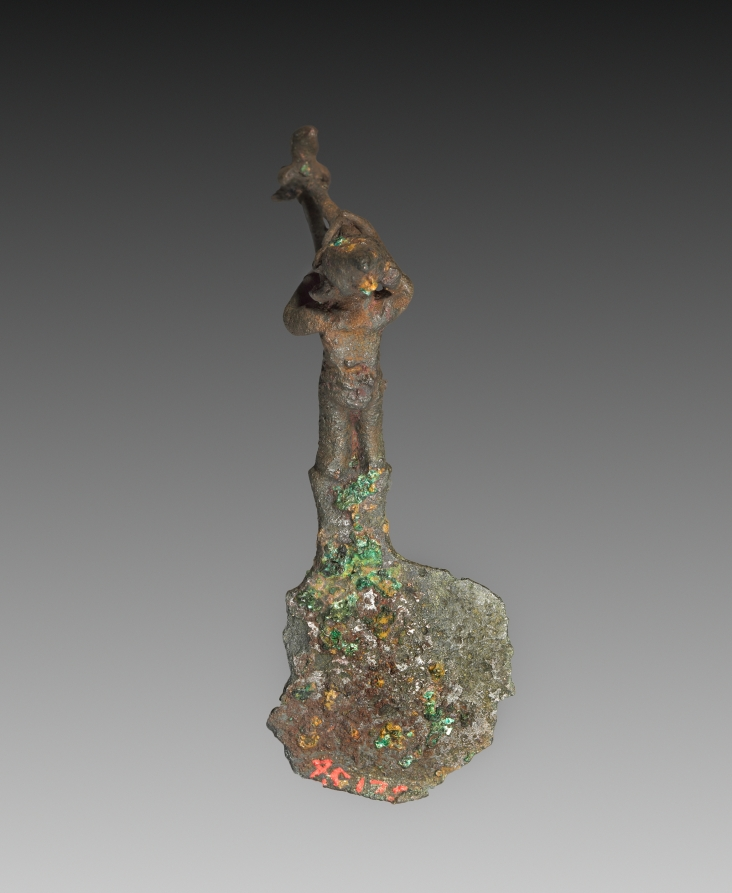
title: Knife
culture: Peru, Inca Culture, 15th-16th century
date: 1400s-1500s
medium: bronze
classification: Metalwork